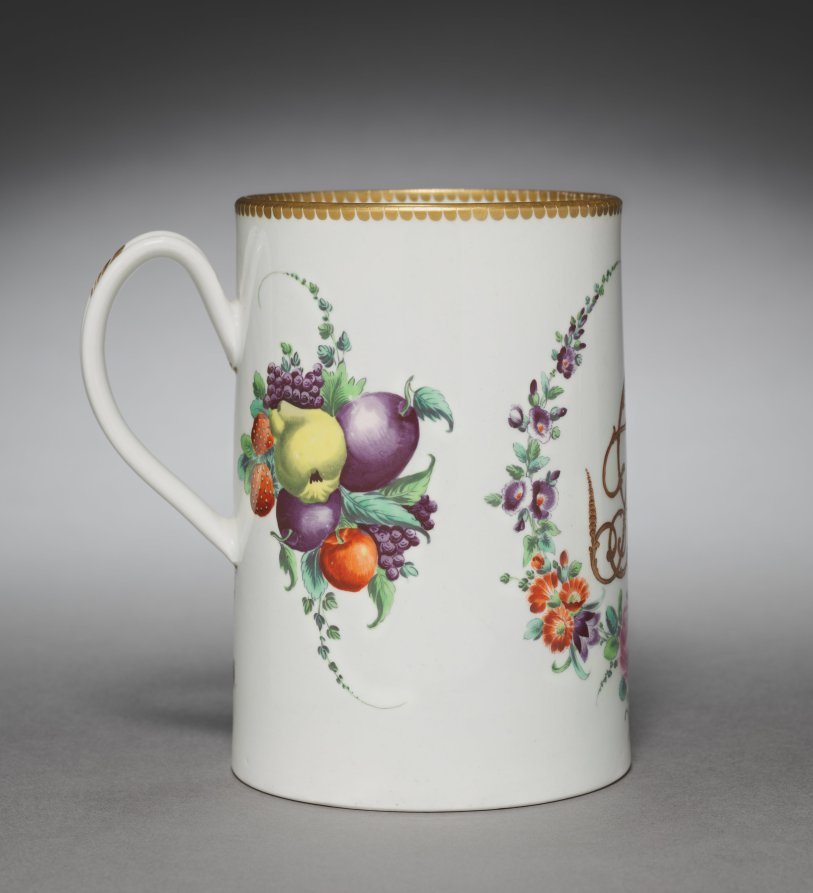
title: Cann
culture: England, 18th century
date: c. 1770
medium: ceramic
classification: Ceramic